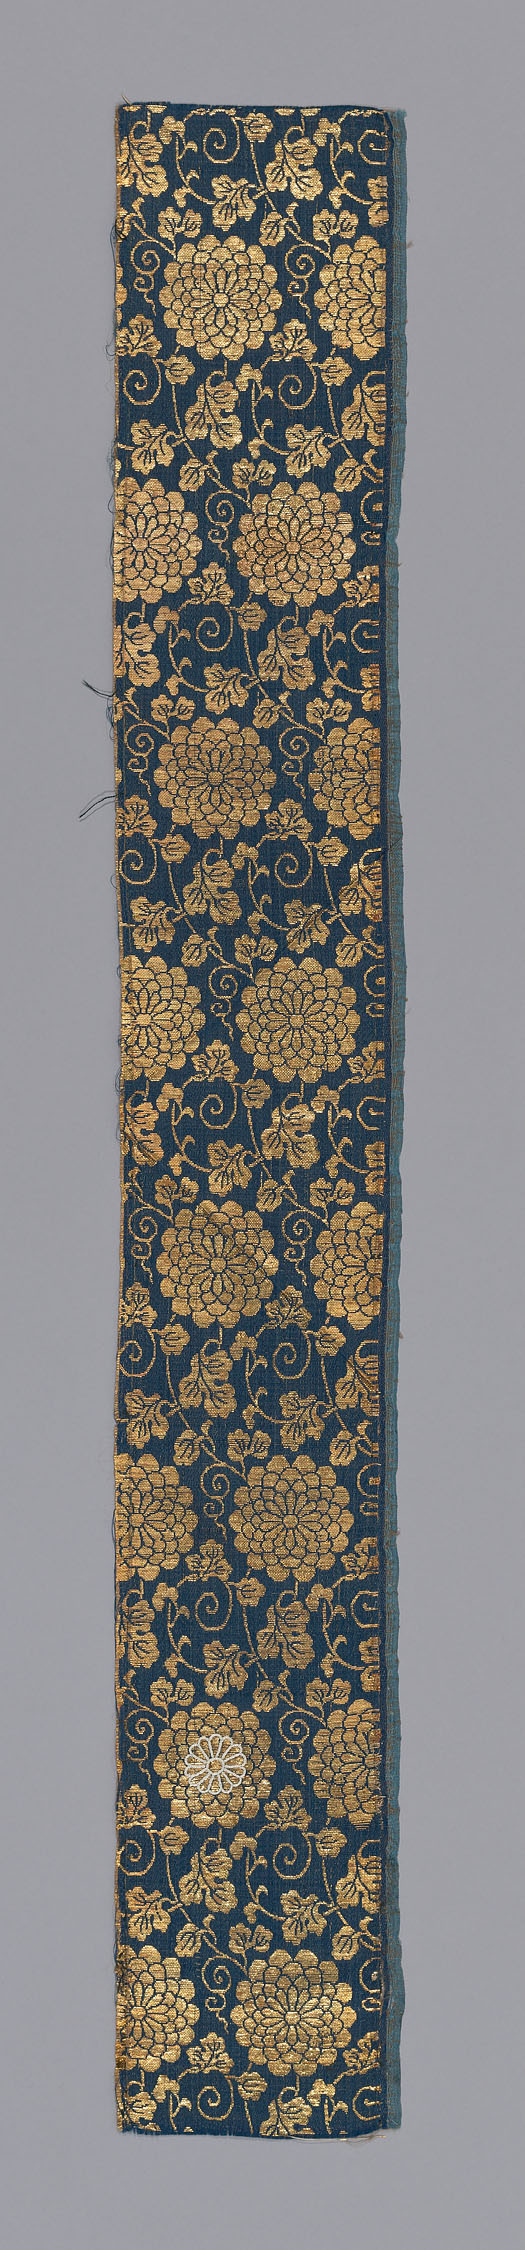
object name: Textile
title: Fragment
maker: Japan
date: late Edo period (1789–1868), 1801/25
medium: Plain compound twill silk and gilt paper; two strips to m.m.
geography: Japan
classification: textile; weaving